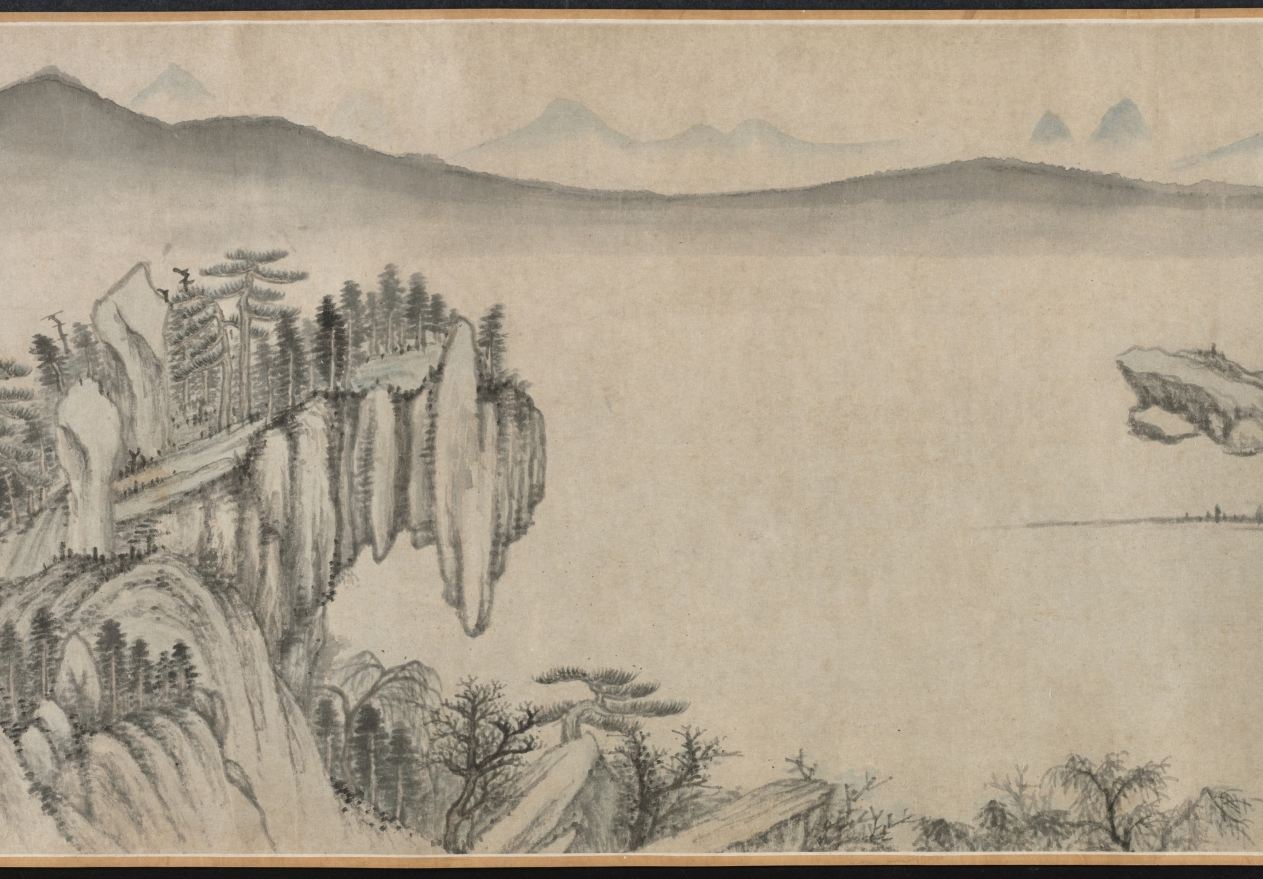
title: Mt. Taibo in the Style of Wang Meng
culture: China, Ming dynasty (1368–1644)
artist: Du Qiong (Chinese, 1396–1474)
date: 1442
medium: handscroll; ink and light color on paper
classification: Painting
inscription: Artist's inscription, signature, and 11 seals: [1 seal] Tung-yüan chai. Huang-ho-shan-ch'iao [Wang Meng] painted a painted called T'ai-po Mountain. Its brushwork is superior and admirable, which is very close to Yu-ch'en [Wang Wei, 699-759]. The cleverness of its composition, the maple groves and rustic temples, the inaccessible ravines and autumnal plateaus, the periolous peaks and strange rocks, etc., all seem to be so natural. The paper is only a little over eight feet, but the landscape has the range of a thousand miles. Once you open and note the contents, it is as if one were roaming among the mountain peaks enveloped in mist and clouds, and forgot the dusty world. When I first saw this, I was so mixed with excitement and joy that I could not take my hands off the painting. So I put it on the table, and tried my best to imitate it, forgetting sleeping and eating for about three months before it was completed. Although I do not dare to tread in the footsteps of Huang-ho shan ch'iao, I took great pains to capture his spirit in composition and colors. I do not know whether it would pass the judgment of the experts. On the fifteenth day of the fifth month, the seventh year of the Cheng-t'ung year [1442], inscribed by Tung-yüan, Tu Chiung. [2 seals] Yung-chia; Ching-chieh ming-men. [8 seals on painting] Tung-yüan chai; Ching-chieh ming-men; Yung-chia; Tu Ch'iung yin; Tung-yüan (repeated 5 times). trans. WKH/LYSL 3 colophons and 7 additional seals: 1 colophon and 2 seals of Chou Ting (1401-1487); 1 colophon and 2 seals of Wu K'uan (1435-1504); 1 colophon, dated 1655, and 2 seals of Lan Ying (1585-after 1664).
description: When a Chinese painter "imitated" a painting by a past master, the intention was never to produce an exact copy. Du Qiong, the Ming painter from Suzhou, is a case in point. The painting style of this handscroll is actually closer to that of Huang Gongwang (1269–1354) than to the style of Wang Meng (about 1301–1385). Both masters were active during the previous dynasty and are among the so-called Four Great Masters of the Yuan dynasty (1279–1368). In this painting, the interplay of styles, including Du Qiong's own, contribute to an inner dimension that is more than visual. Mt. Taibo is located in the province of Zhejiang and is known for its scenic beauty. In this scroll, however, it is not depicted literally. The image is an ideal representation of mountains in southeastern China.